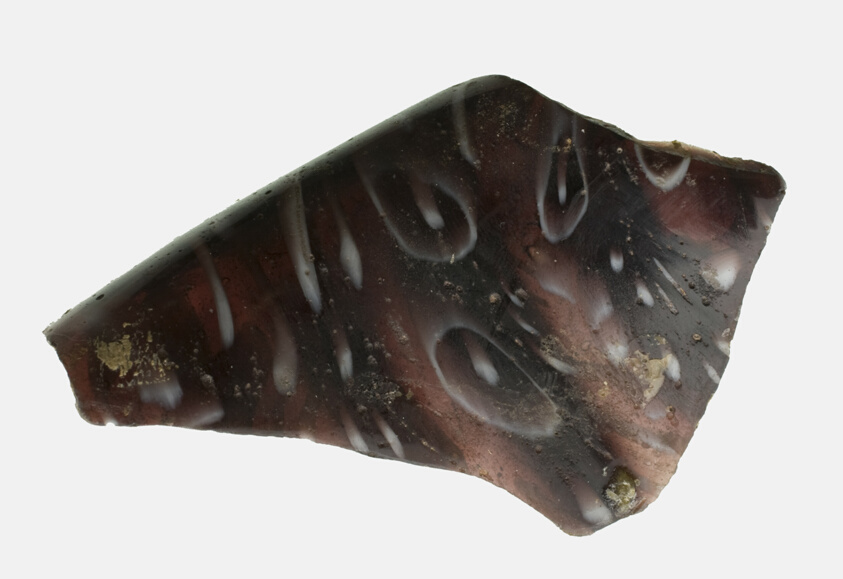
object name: Decorative Arts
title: Fragment of a Bowl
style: roman (ancient, style or period), ancient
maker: Roman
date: 1st century BCE–1st century CE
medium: Glass, mosaic glass technique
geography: Roman Empire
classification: fragment; decorative arts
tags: decoration